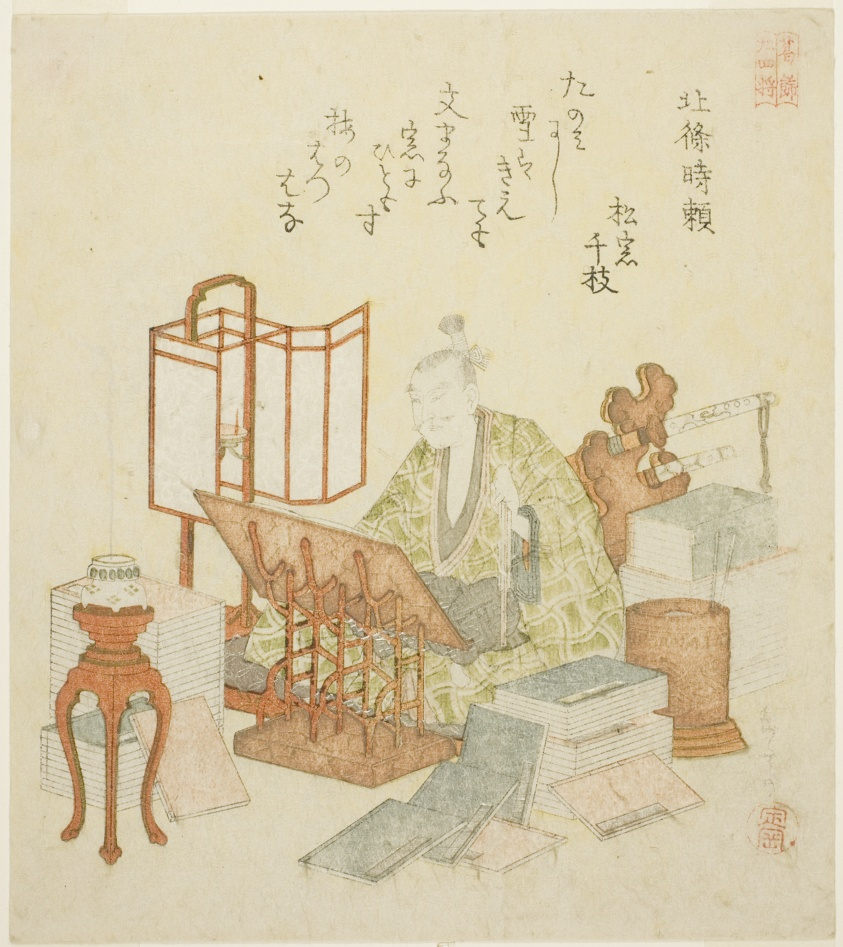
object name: Print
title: Hojo Tokiyori, from the series "Twenty-four Generals for the Katsushika Circle (Katsushika nijushisho)"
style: Japanese (culture or style)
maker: Yashima Gakutei (Japanese, 1786 (?)-1868)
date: c. 1822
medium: Color woodblock print; shikishiban, surimono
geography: Japan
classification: woodblock print; print; asian art